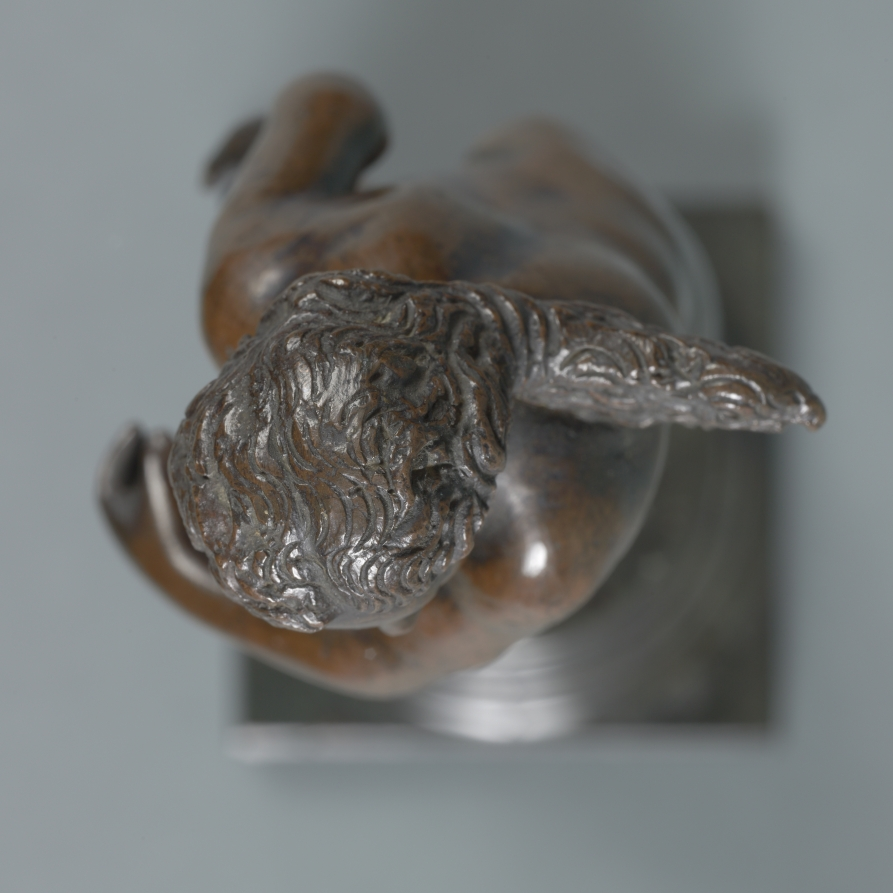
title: Thetis Running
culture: Italy, Ravenna, 16th century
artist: workshop of Severo da Ravenna (Italian, c.1496–c.1543)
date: c. 1527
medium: bronze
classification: Sculpture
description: The complex, corkscrew-like twist of the figure’s body around a central axis indicates that this work was meant to be seen and admired in the round. Producing a sculpture of a body in motion posed a challenge for Renaissance artists, and complex compositions like this were often adapted from prints and paintings. The pose of this bronze statuette may have been inspired by a print representing the Greek sea goddess Thetis. Thetis was courted by the gods Zeus (Jupiter) and Poseidon (Neptune), but was eventually married to the mortal Peleus; the Greek hero Achilles was their son. In the print, Thetis pours water from a jug held at her hip and her upraised foot rests on a large shell, both referencing her role as sea goddess. The statuette’s lack of identifying attributes encourages the viewer to focus instead on the figure’s graceful spiraling form, and the sculptor’s skill in creating a convincing sense of movement.